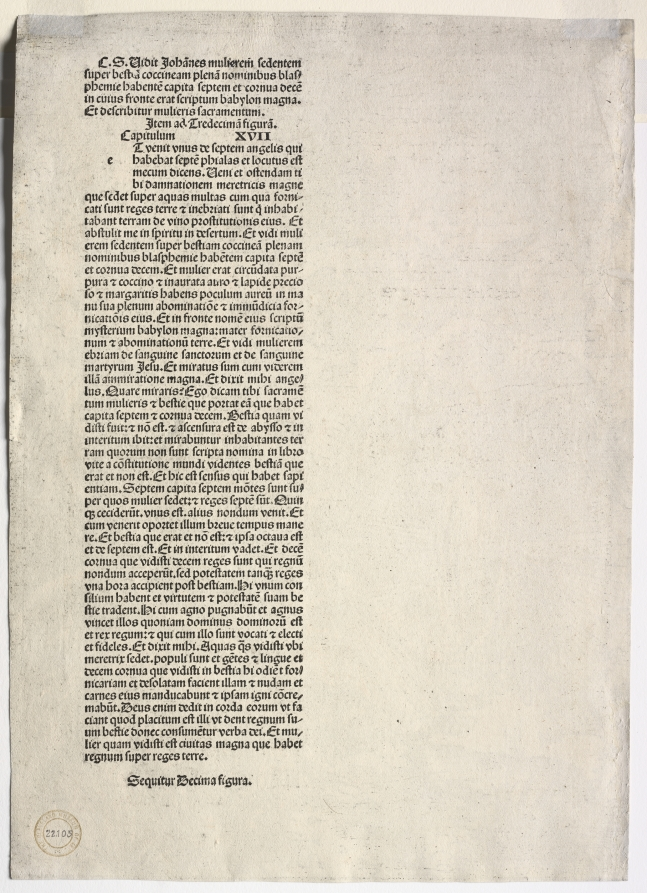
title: Revelation of St. John: The Woman Clothed with the Sun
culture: Germany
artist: Albrecht Dürer (German, 1471–1528)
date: 1511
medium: woodcut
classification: Print